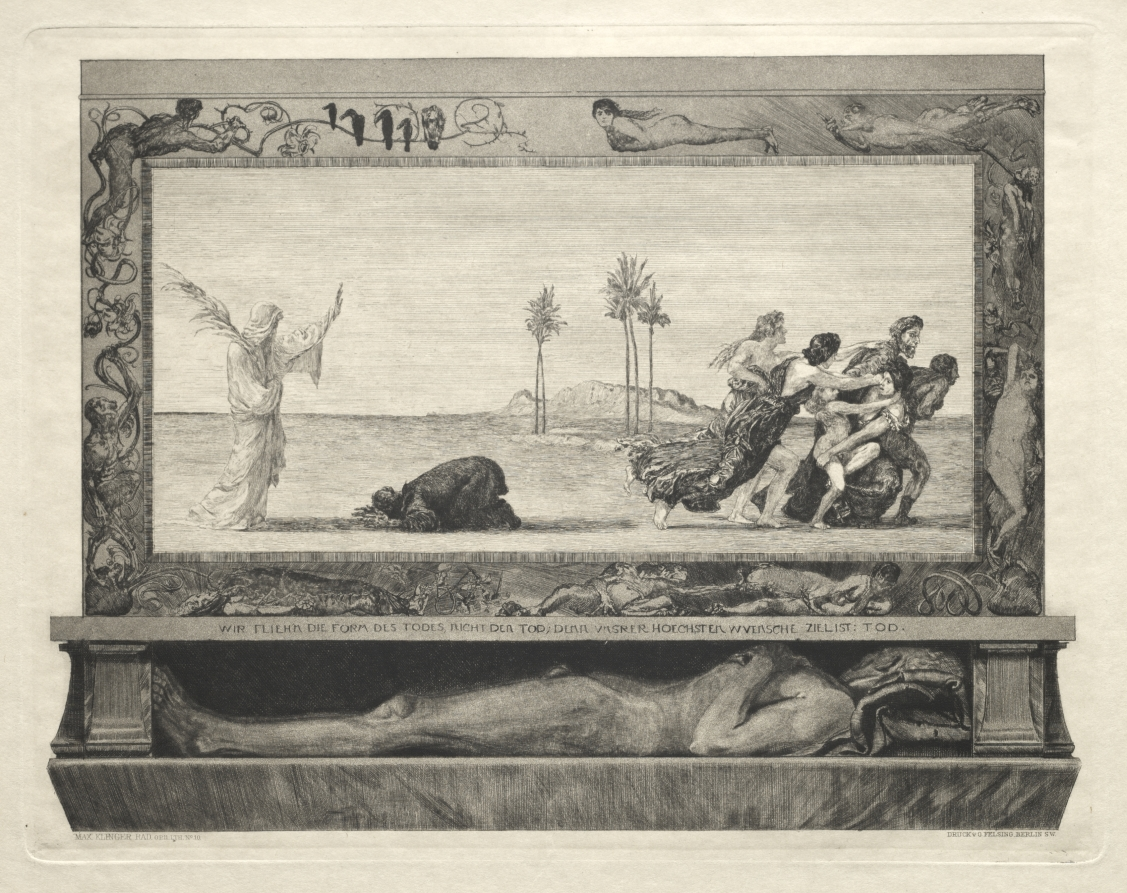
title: Vom Tode I, (Opus II, 1889) No. 10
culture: Germany, late 19th century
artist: Max Klinger (German, 1857–1920)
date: 1889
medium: etching and aquatint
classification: Print